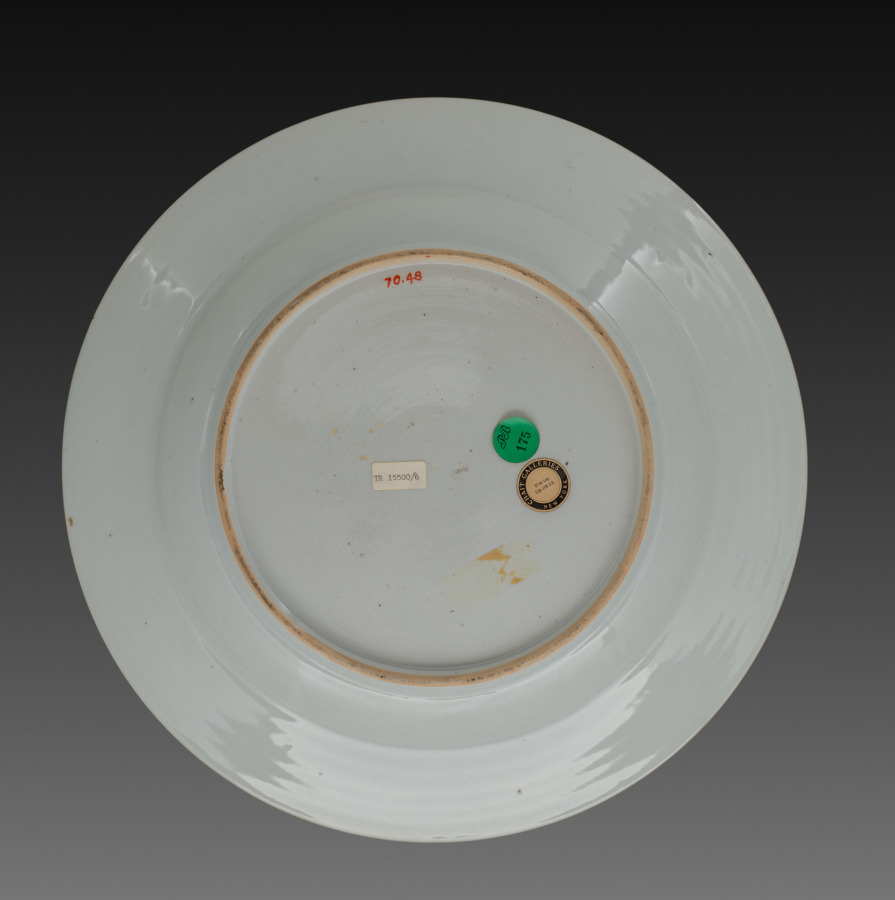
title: Charger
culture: China, Chinese Export, 18th century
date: c. 1750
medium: porcelain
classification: Ceramic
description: This plate demonstrates the commercial exchange of products—in this case prints and porcelain—between Europe and Asia in the 1700s. Here, a Chinese porcelain factory adapted a French print to decorate a dish for the European market. It depicts a fable by Jean de La Fontaine in which a barrel-maker’s wife dallies with a lover while her husband is working.